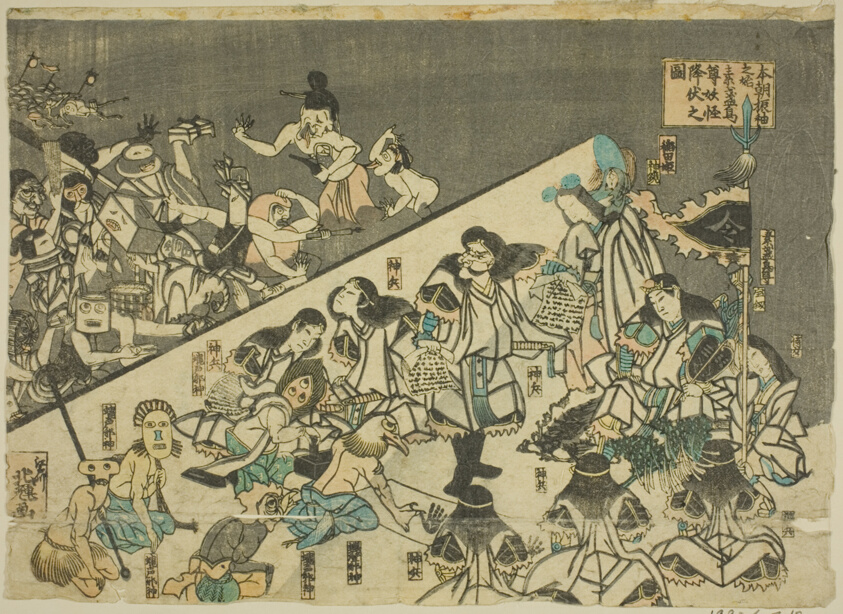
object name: Print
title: Honcho furisode no hajime, Susanoo no mikoto yokai ? no zu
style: Japanese (culture or style)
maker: Katsushika Hokki (Japanese, active c. 1804-18)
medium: Color woodblock print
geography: Japan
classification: woodblock print; print